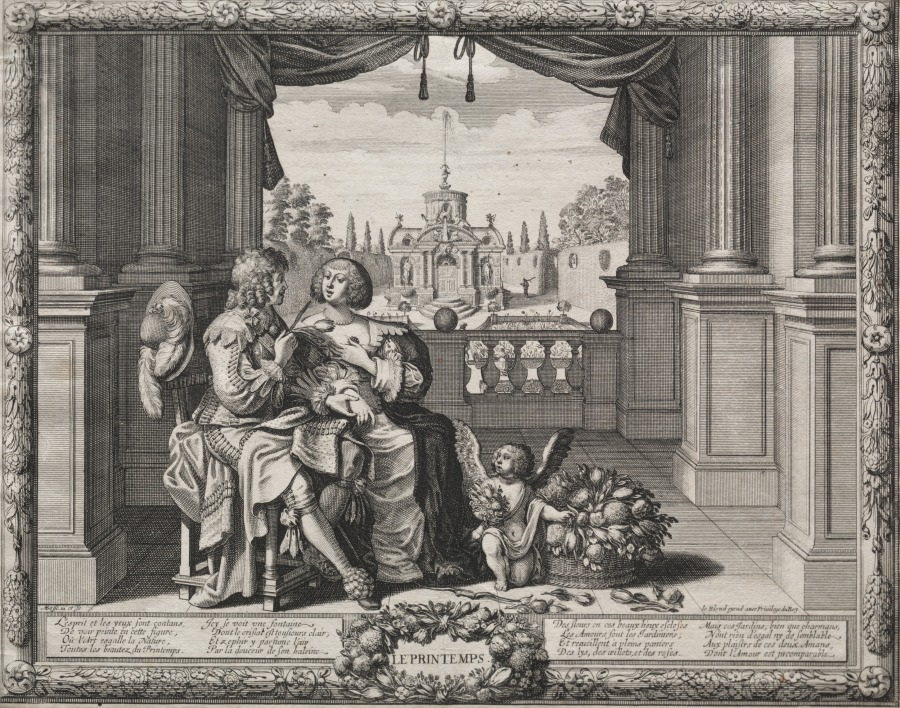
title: The Four Seasons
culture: France, 17th century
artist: Abraham Bosse (French, 1602–1676)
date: 1635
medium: engraving and etching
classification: Print